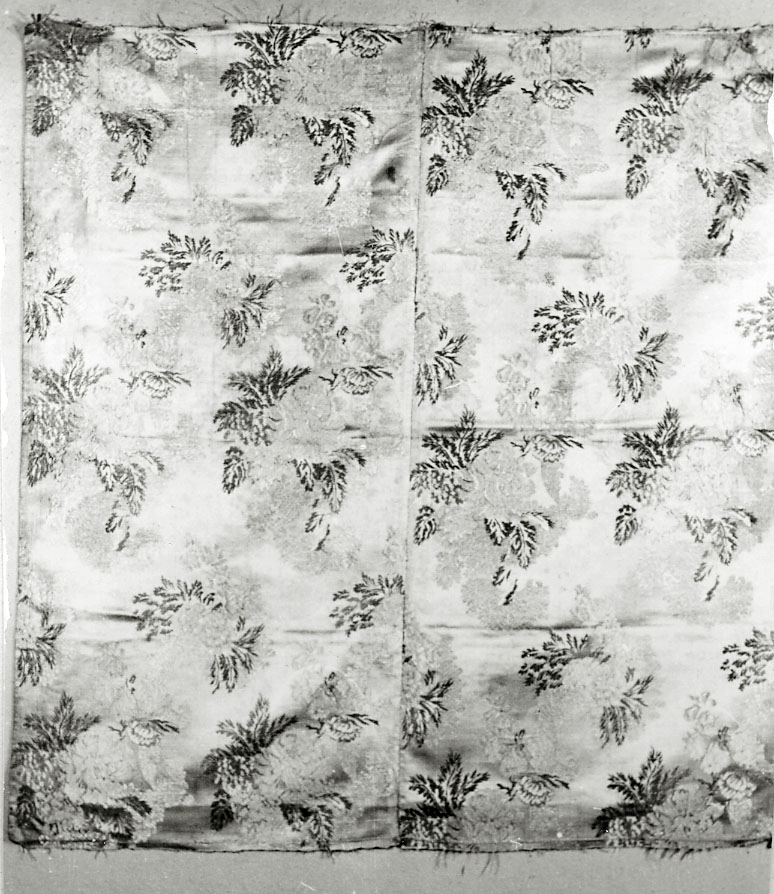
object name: Textile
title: Silk (2 pcs)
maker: Spain or Italy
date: 18th century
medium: Silk, brocaded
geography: Spain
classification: textile; weaving